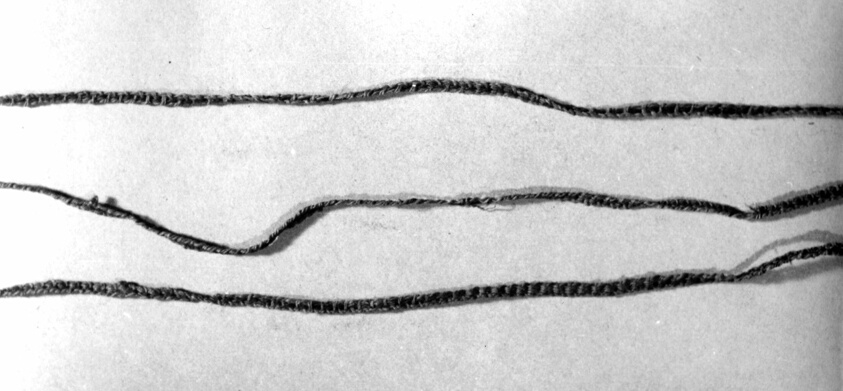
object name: Textile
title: Fragments (Band)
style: nazca, andean, andes, Pre-Columbian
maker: Nazca; Nazca Valley, south coast, Peru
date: 100 B.C./A.D. 200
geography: Peru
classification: textile; weaving